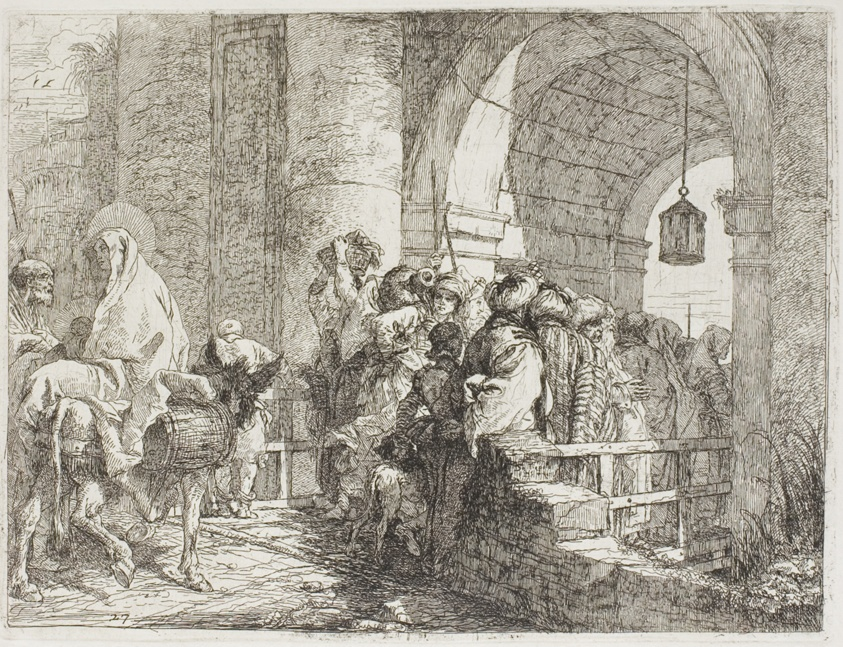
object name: Print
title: The Holy Family Arriving at a City Gate, plate 27 from The Flight into Eypt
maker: Giovanni Domenico Tiepolo (Italian, 1727-1804)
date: 1753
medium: Etching on paper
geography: Italy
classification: etching; print; prints and drawing